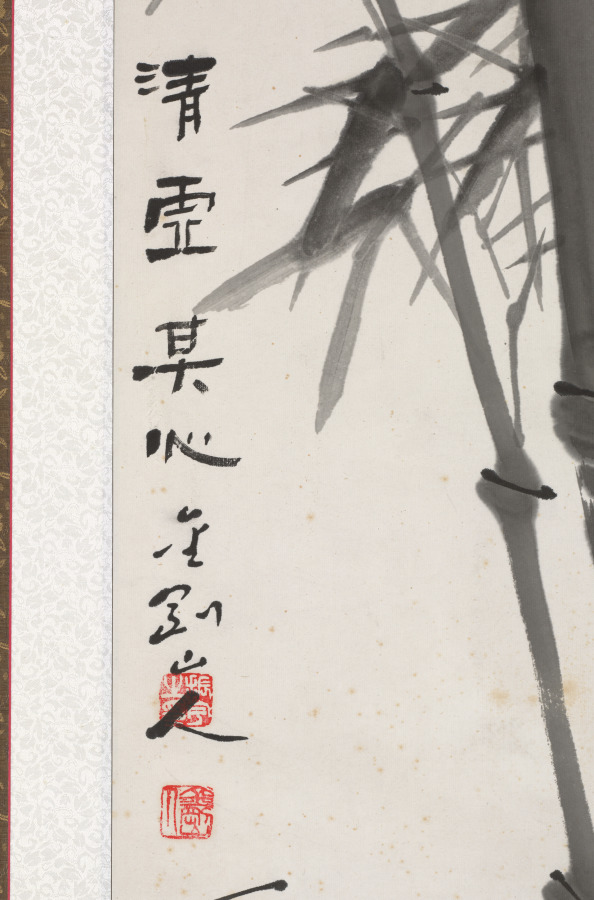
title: Bamboos in Wind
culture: Korea, Japanese colonial period (1910−1945)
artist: Kim Jin-woo (Korean, 1883–1950)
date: 1934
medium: Ten-panel folding screen; ink on paper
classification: Painting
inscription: Two chops stamped on each panel: 振宇之印 (Jinwoo’s Seal); 金剛山人 (Diamond Mountain Man)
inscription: Inscription written on the far-left panel: 甲戌流??寫於竹林堂金剛山人振宇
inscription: Inscription written on the 8th panel: 五百間淸風金剛山人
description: Active during the Japanese colonial period in Korea (1910–45), the artist Jin-woo Kim earned his artistic reputation for his expressive renditions of bamboo swaying in a strong wind. His piercing bamboo shoots are often compared to an iron spear, and their sharp leaves to a knife. It is believed that he deliberately emphasized sharpness in his brushstrokes to express his strong resistance against Japanese colonial oppression.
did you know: The artist’s prolific artistic production were a major part of fundraising efforts to support resistance activities for Korea’s independence.